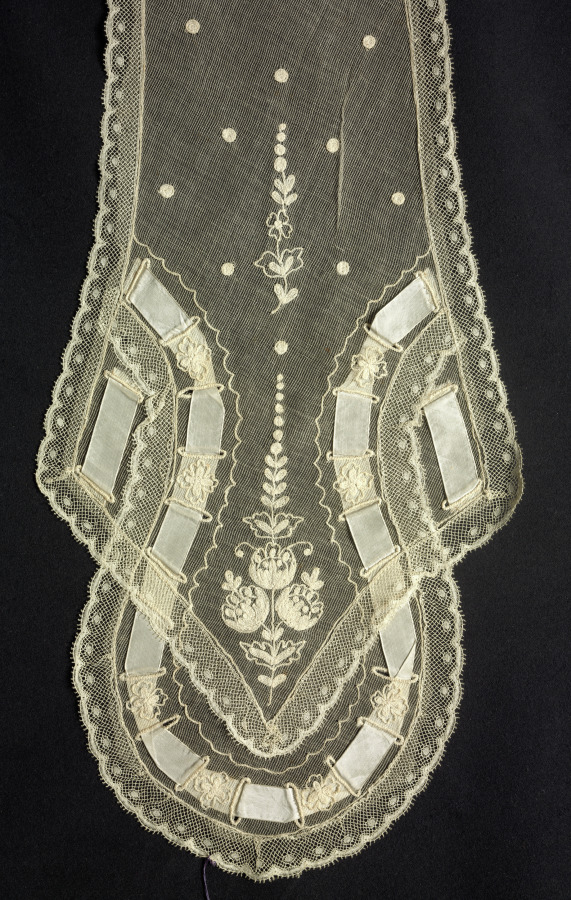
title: Lace Collar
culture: America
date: 1840–60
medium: Bobbin lace edging and embroidery on machine-made cotton net, silk ribbons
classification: Lace